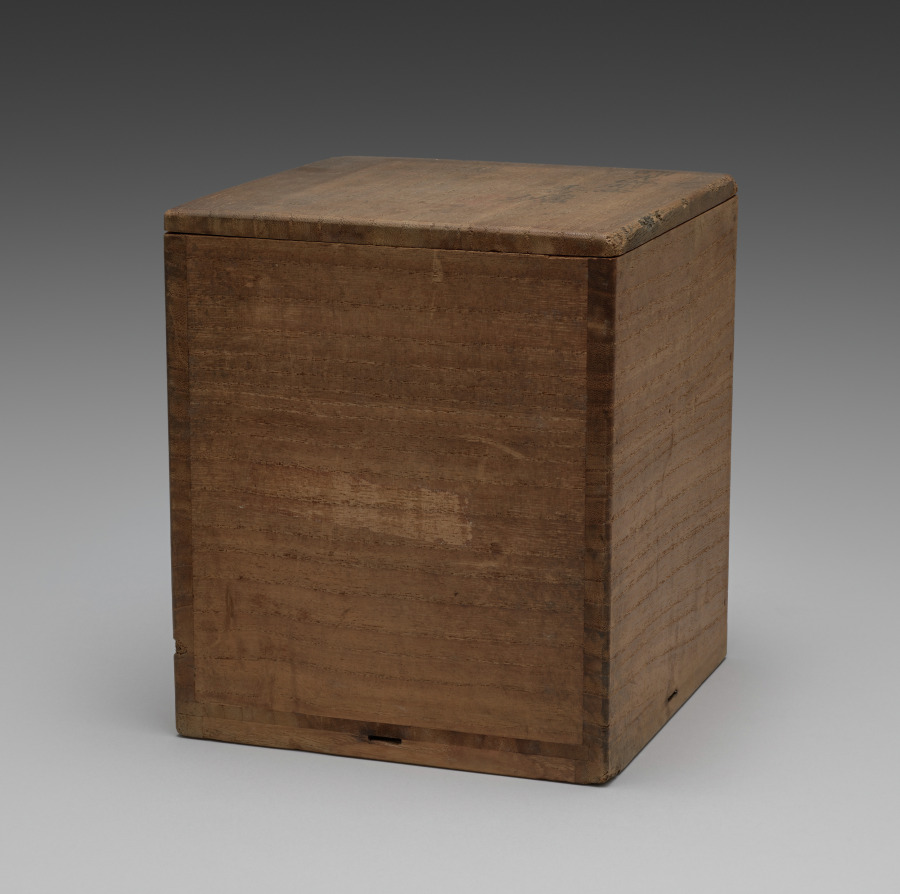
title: Incense Burner with Peony and Cloud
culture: Japan, Meiji period (1868–1912)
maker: Seifū Yohei III (Japanese, 1851–1914)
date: 1914–46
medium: Porcelain with molded and incised design, pale pink glaze, and floral openwork silver lid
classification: Ceramic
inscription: 清風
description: Yohei IV’s incense burner has a scrolling floral pattern of peonies and nyoi staff-head forms around the body and a band of clouds around the collar. These are done in low relief, with incised lines marking the details in the flower petals and leaves. The silver lid has a proliferation of flowers, including lily, peony, and a variety of chrysanthemums. The box lid identifies the subtle pink over an ivory body as “dawn’s light[–glazed] porcelain” (shokōji). After he became an Artist of the Imperial Household, Yohei III created a number of glaze and clay combinations with what would have been considered Japan-focused names to be in alignment with his position as an artist representing the nation. Among them was a glaze called “dawn’s light pale [pink] color” (akebonoiro tansai), which he invented in 1895. It is possible that this incense burner is an example with this glaze, despite the slightly different name given on the box. While the name alludes to the Land of the Rising Sun, an epithet for Japan, the burner’s motifs remain very much drawn from the Chinese repertoire.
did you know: Seifū Yohei IV’s incense burner has a pale pink glaze named “dawn’s light.”